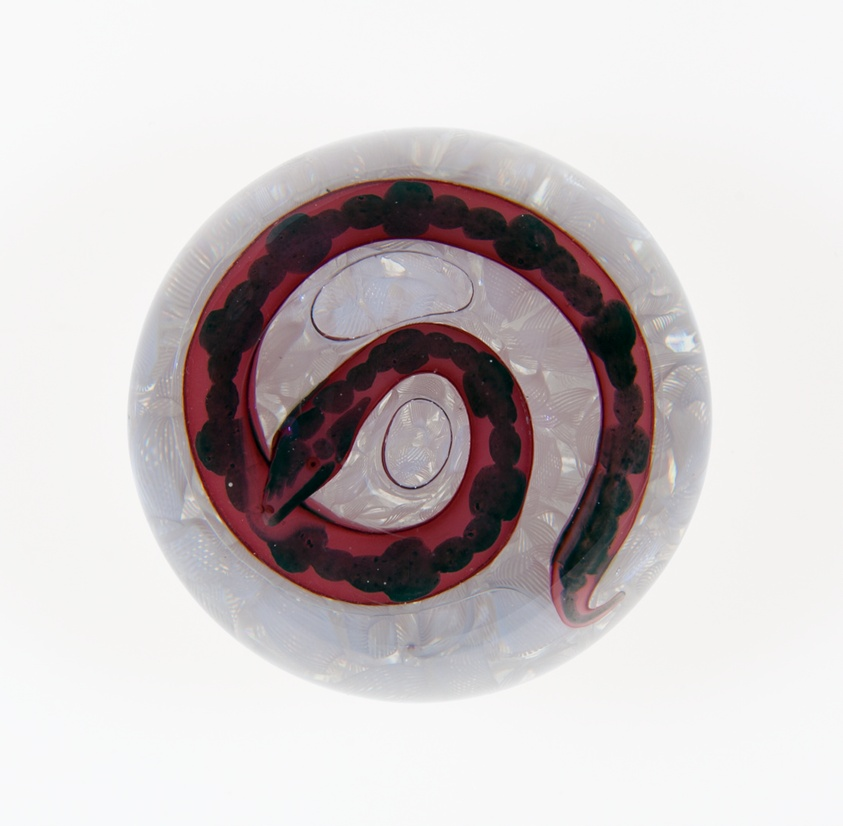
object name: Glass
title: Paperweight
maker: Saint-Louis Glassworks (Cristalleries de Saint-Louis); Lorraine, France, founded 1586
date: c. 1845–60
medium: Glass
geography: Saint-Louis-lès-Bitche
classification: paperweight; glass